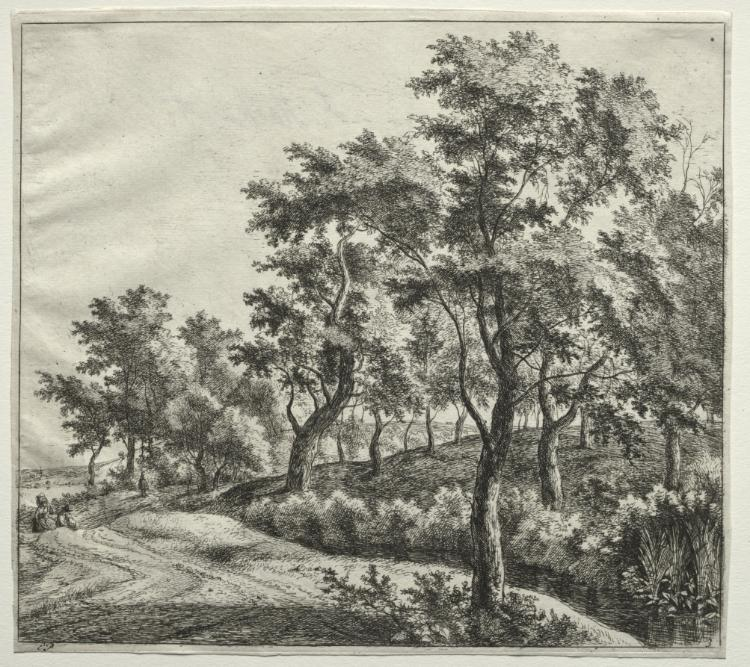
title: The Narrow Stream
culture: Netherlands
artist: Jan Hackaert (Dutch, 1629–c. 1700)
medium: etching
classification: Print